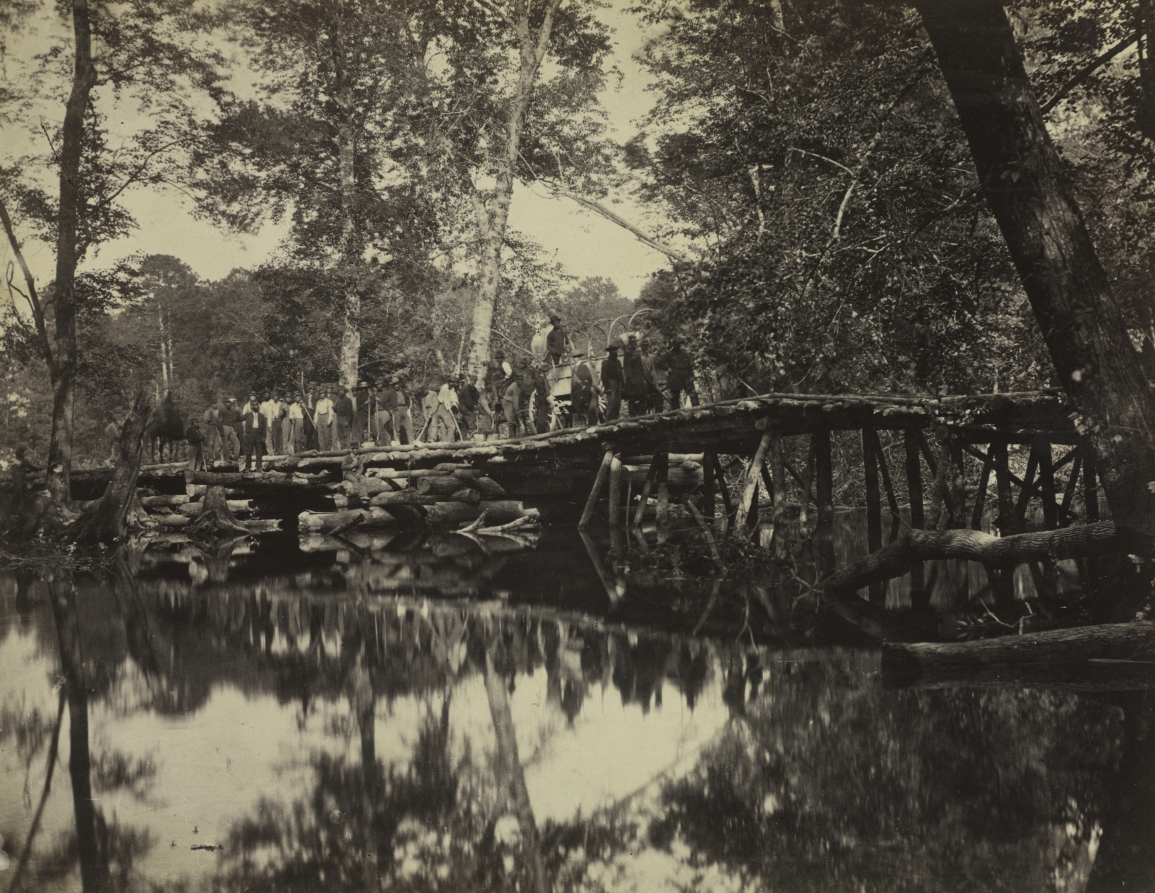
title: Military Bridge, Across the Chickahominy, Virginia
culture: America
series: Alexander Gardner's Photographic Sketchbook of the War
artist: David B. Woodbury (American, 1866)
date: 1862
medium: albumen print, gold toned, from wet collodion negative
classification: Photograph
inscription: Written in pencil on recto: "23"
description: In this complex composition, David B. Woodbury merged the documentation of an event with his desire to record an impressive landscape. The image depicts a precarious, yet essential military log bridge that traverses a swamp created by the accumulated waters of the Chickahominy River, located southeast of Richmond, Virginia. Constructed under difficult physical conditions, the structure was later destroyed by floodwaters caused by heavy rains. The workers involved with the structure's construction are positioned in a single line so that each person is identifiable; however, reduced to diminutive size by the camera's distant viewpoint, the workers appear to be dominated by their natural environment. This image appeared in the first volume of a two-volume set of 100 Civil War photographs published between 1865–66 by Alexander Gardner (1821–1882), who printed the negatives and compiled the album, which included work by a number of other photographers.